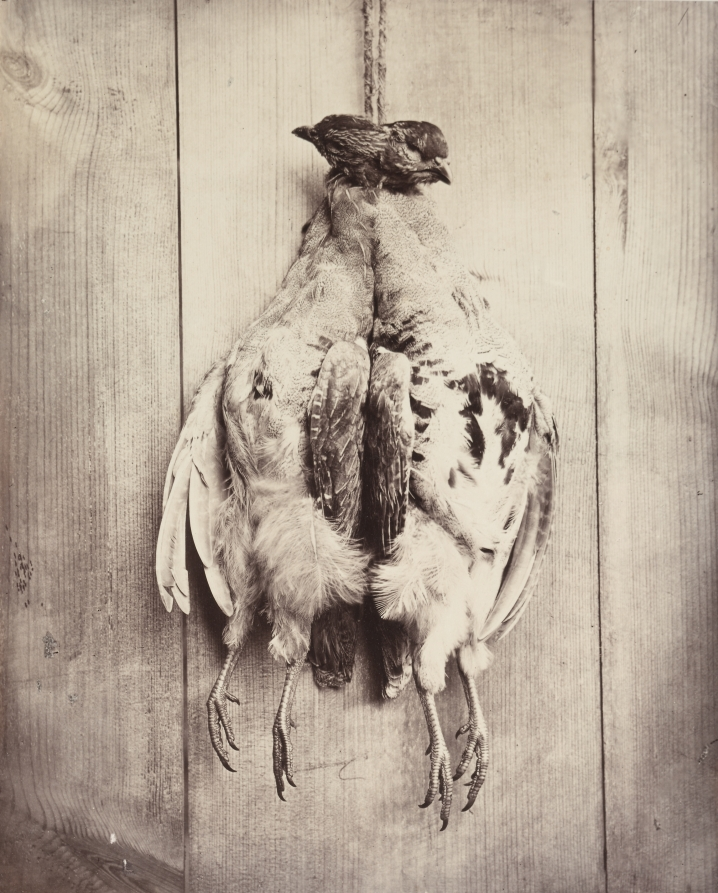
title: Partridges (recto)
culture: England, 19th century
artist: Captain N. Baily (British)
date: c. 1861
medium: albumen print from wet collodion negative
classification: Photograph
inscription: Written in ink on pasted paper on recto: "Partridges/W. Baily, Esq." (writing on back of pasted label)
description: N. Baily carefully arranged a simple composition of two partridges hanging by a thin rope against a plain wood wall. Like many photographers in the 1850s and '60s, he was interested in displaying the camera’s ability to record in detail the variety of shapes and textures present in the still life. Little is known of Baily, a British amateur photographer. He was a member of the Amateur Photographic Association and participated in several of their album exchanges. Still lifes incorporating game, fowl, and fish were popular among amateur photographers during this period. Many members of the Amateur Photographic Association were gentlemen that formerly belonged to the British armed forces and would have participated in hunting as a pastime.